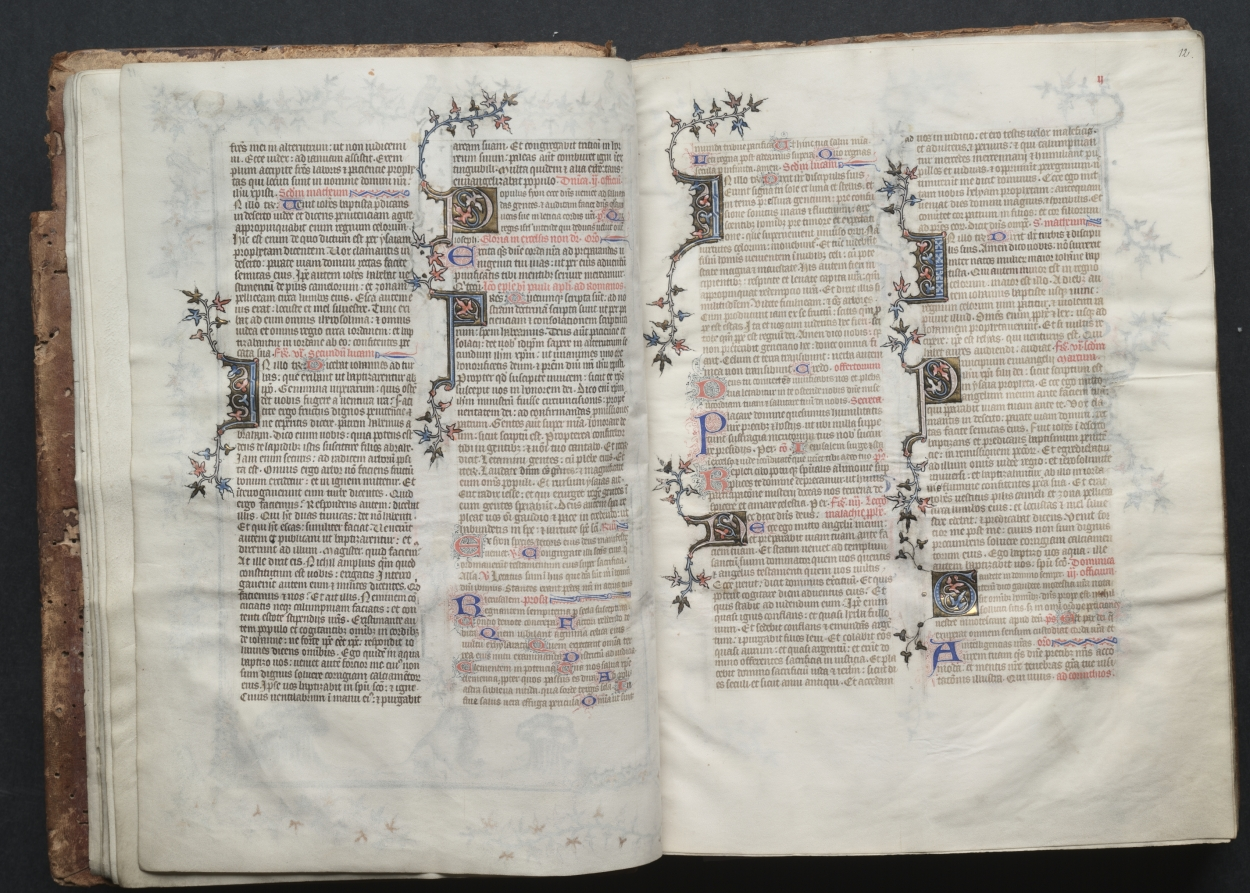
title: The Gotha Missal: Fol. 12r, Text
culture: France, Paris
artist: Master of the Boqueteaux (French)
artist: and Workshop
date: c. 1375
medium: ink, tempera, and gold on vellum; blind-tooled leather binding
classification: Bound Volume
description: The style and quality of this manuscript's decoration is typical of deluxe Parisian books made for aristocratic or royal patrons. Most of the book's decoration appears to be the work of the Master of the Boqueteaux, an artist active at the court of King Charles V (died 1380). His style was apparently shared by a number of book illuminators working in and around Paris. It is very possible that the Gotha Missal belonged to Charles V, but is not provable because the manuscript has no royal portraits and lacks a colophon. Given the book's magnificent decoration, however, it would seem that it was produced for a Valois prince, if not for the king himself. The manuscript receives its name from the German dukes of Gotha, its later owners.